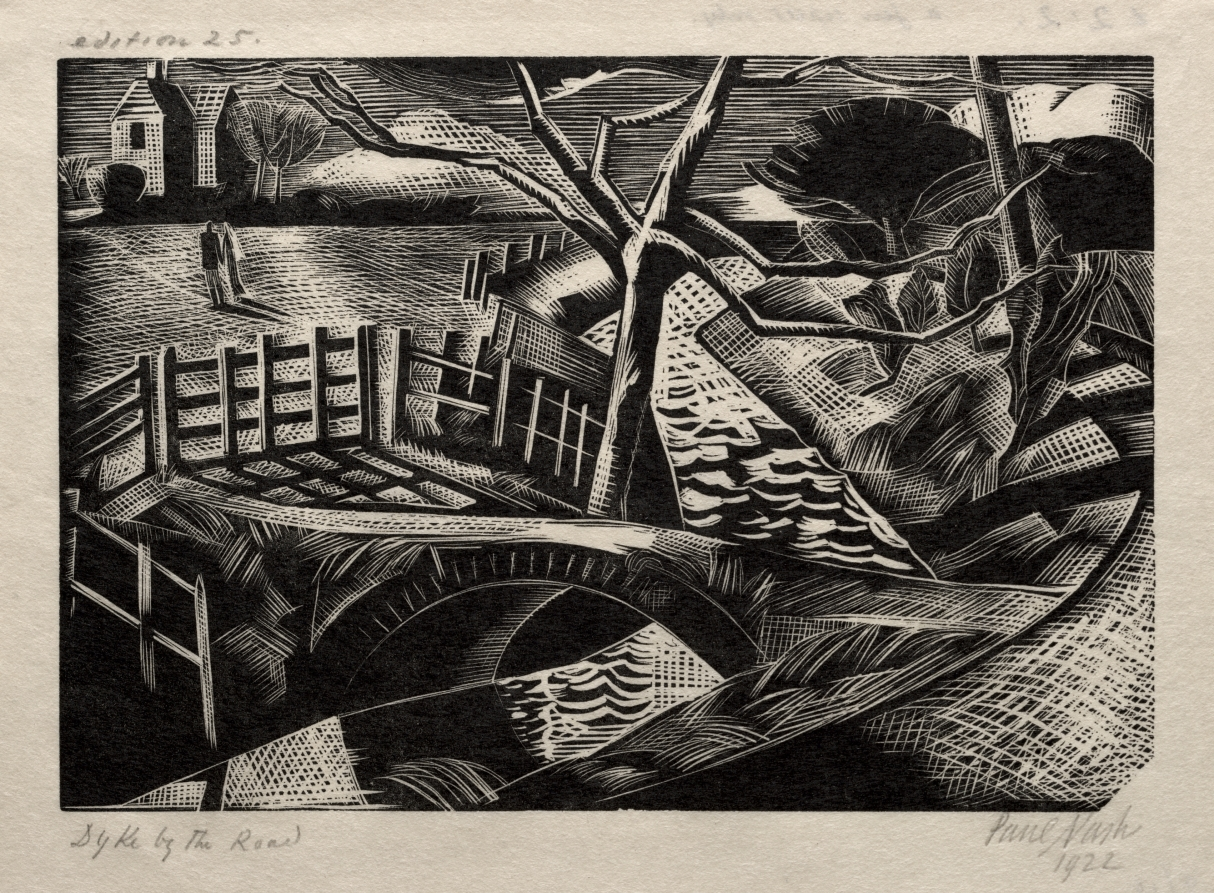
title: Dyke by the Road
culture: England, 20th century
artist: Paul Nash (British, 1889–1946)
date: 1922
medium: wood engraving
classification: Print